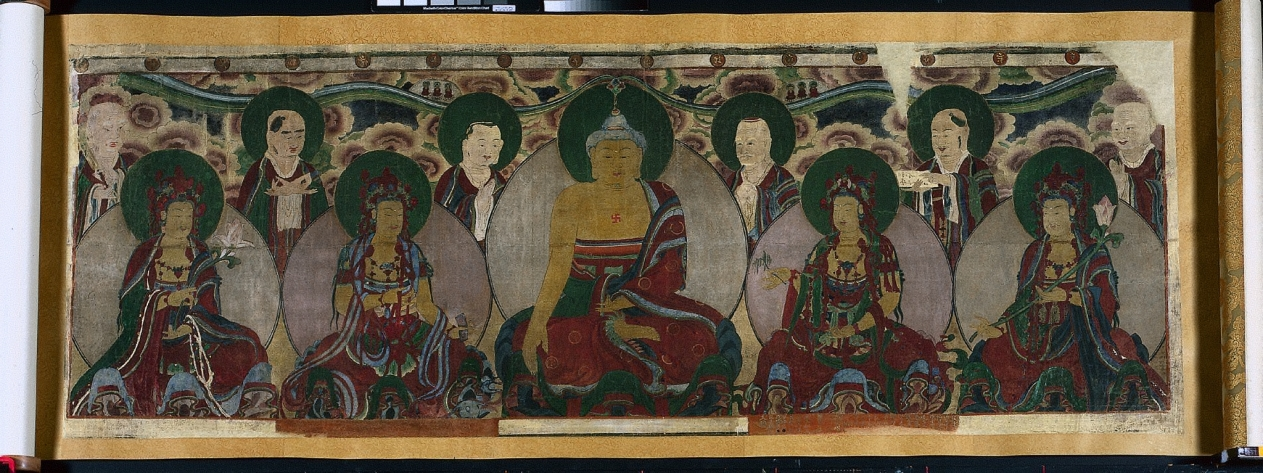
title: Assembly of Buddhist Deities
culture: Korea, Joseon dynasty (1392–1910)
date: 1846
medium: handscroll; ink and color on silk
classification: Painting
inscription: Inscription dated 1846.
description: The central deity in this Buddhist painting is Sākyamuni Buddha, given that he is displaying the earth-touching hand gesture. He is surrounded by several bodhisattvas and disciples. The inscription below, even though partly erased, tells us that the painting was created in 1846 and was hung in the monks’ residential hall.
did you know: The inscription below, even though partly erased, tells us that the painting was hung in the monks’ residential hall.